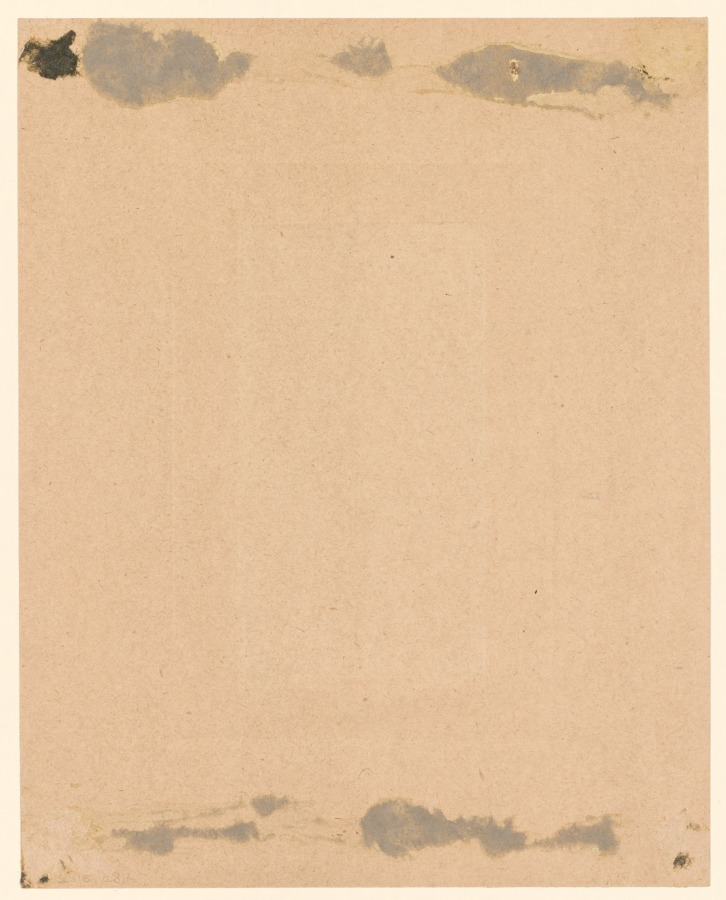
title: Sultan Abdullah Qutb Shah (1614-74) on Horseback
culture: Southern India, Golconda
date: c. 1635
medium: Ink, watercolor, and gold on paper, mounted with gold-sprinkled borders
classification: Painting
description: Sultan Abdullah Qutb Shah came to the throne of Golconda at the age of twelve and ruled until 1635 when the Mughal emperor Shah Jahan invaded the Deccan. Although Sultan Abdullah Qutb Shah kept his position, he did so under conditions named by Shah Jahan that included the payment of tribute money, conversion to Sunni Islam, and the presence of a Mughal political agent at the Golconda court. In this watercolor portrait, executed with subdued colors that complement the gold accents, the young Sultan wears a diaphanous shawl over his richly embroidered robe. His horse is almost as lavishly dressed in decorative trappings and jewels as his rider.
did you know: Specks of gold are sprinkled around the edges of this portrait.